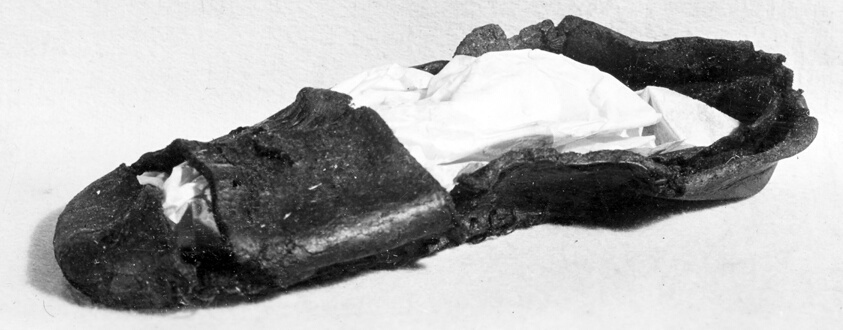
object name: Costume and Accessories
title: Child's Shoe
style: elizabethan, tudor, european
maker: England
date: 16th century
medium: Leather with slashed toe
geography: England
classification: textile; costume accessory - shoe; shoes - misc; costume; dress (garment); clothing